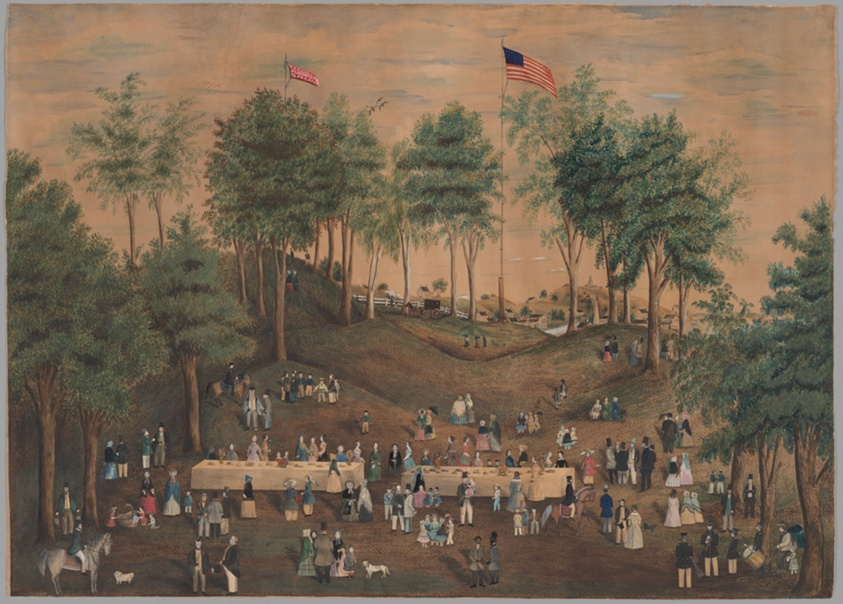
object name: Drawing and Watercolor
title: Anti-Slavery Picnic at Weymouth Landing, Massachusetts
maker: Susan Torrey Merritt (American, 1826-1879)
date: c. 1845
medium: Watercolor and opaque watercolor, with pen and black ink, graphite, and collage of painted and metallic papers, on tan wove paper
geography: United States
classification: watercolor; drawings (visual works); prints and drawing